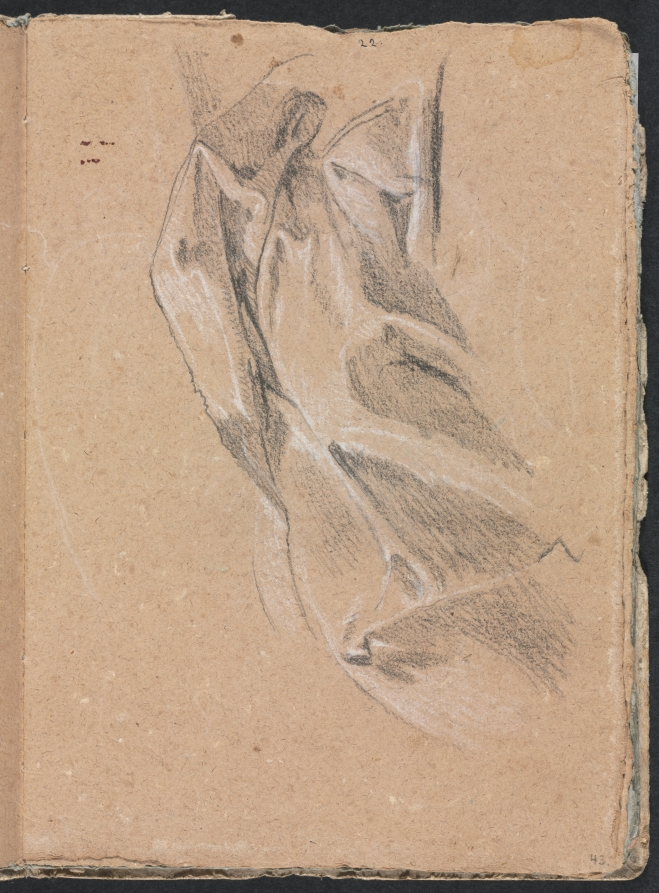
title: Verona Sketchbook: Drapery study (page 43)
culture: Italy, 18th century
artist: Francesco Lorenzi (Italian, 1723–1787)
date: 1760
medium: black chalk with white heightening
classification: Bound Volume